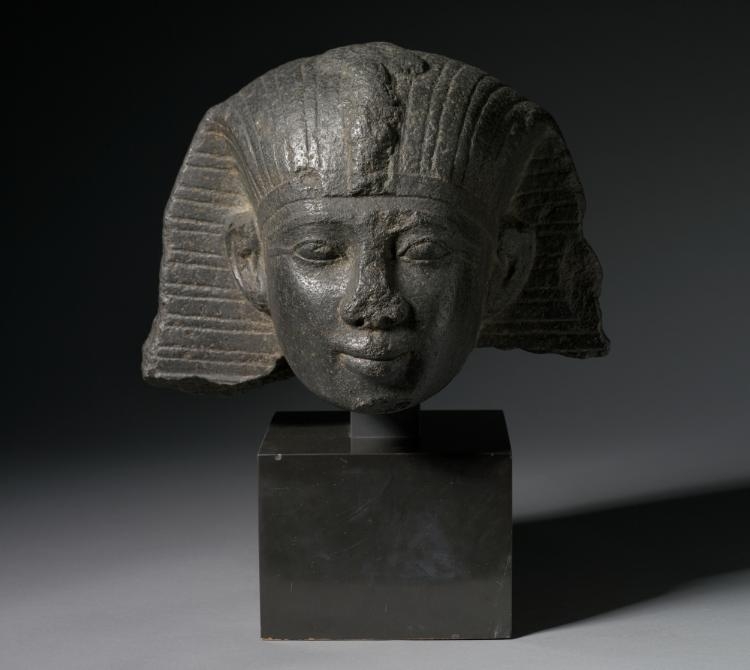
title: Head of a King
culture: Egypt, Third Intermediate (1069–715 BCE), Dynasties 21–22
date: c. 1069–715 BCE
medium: granodiorite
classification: Sculpture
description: This head was the first Egyptian royal sculpture to enter the museum. Although regal in appearance, the rather generalized facial features are not indicative of any specific ruler. It appears to be a work of the Third Intermediate Period, when artists drew inspiration from the elegant, idealizing style of the 18th Dynasty.